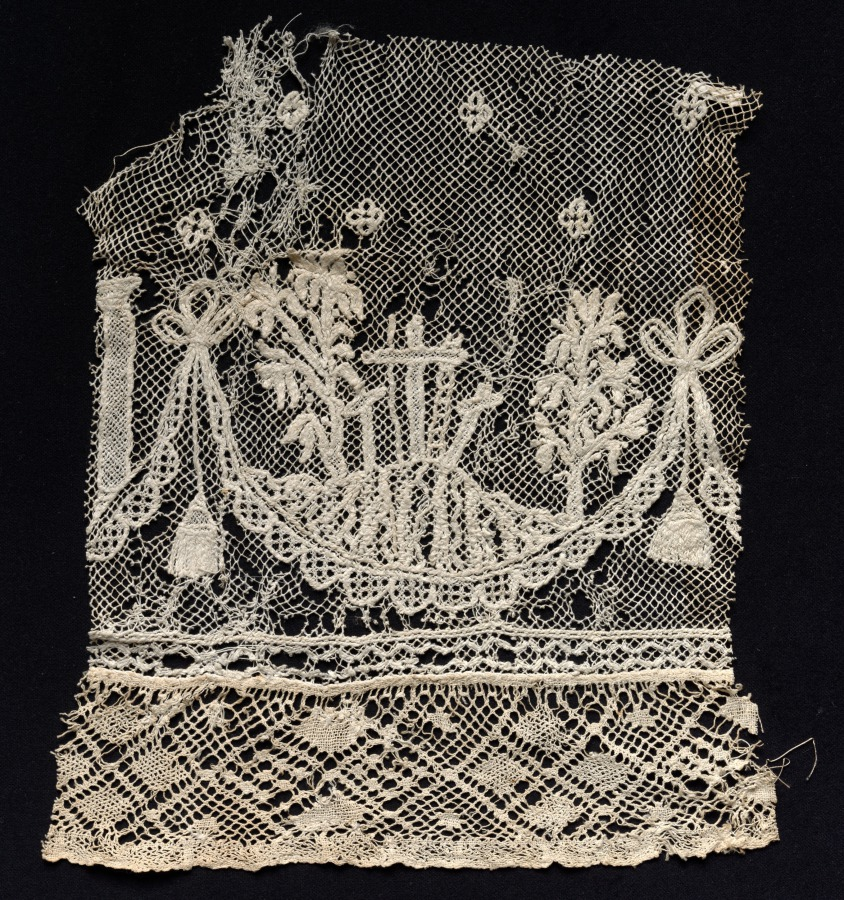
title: Fragment of a Band with Three Crosses of the Crucifixion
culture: Spain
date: 1700s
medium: Bleached linen (est.): needle lace, filet/lacis (knotted ground and darned in one direction) and burato (twined ground and darned in two directions)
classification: Lace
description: The three crosses on a hill depicted in this piece of lace reference Golgotha or Calvary, the hill upon which Jesus was crucified. The ladder resting against the central cross suggests the Deposition of Christ. The scene is ensconced within a decorative scallop, imitative of lace and tassels, perhaps indicating that the larger piece from which this fragment was cut included a series of scenes from the Passion of Christ.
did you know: Myrta Leonora Jones, the donor of this work, was a women’s rights activist in Cleveland in the early 20th century.